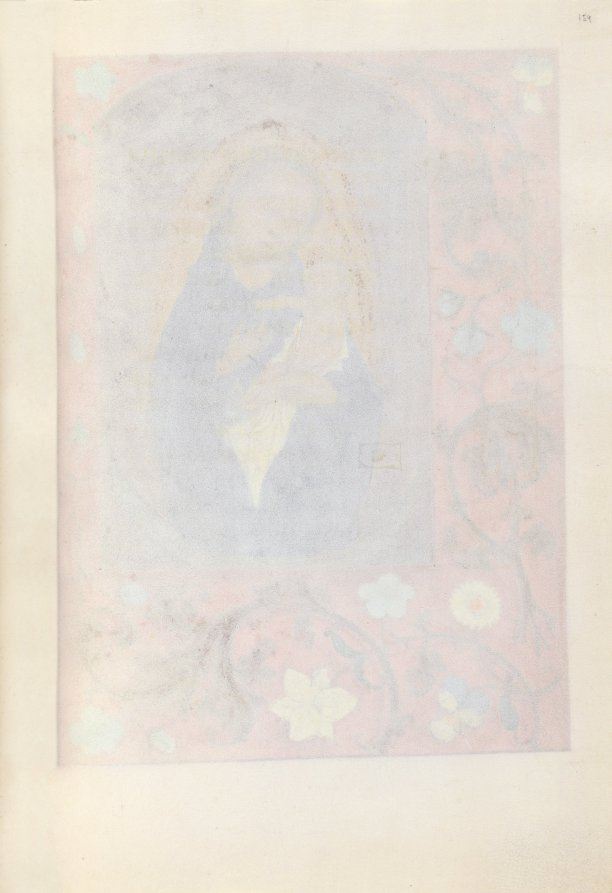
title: Hours of Queen Isabella the Catholic, Queen of Spain: Fol. 159r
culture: Flanders, Ghent and Bruges, late 15th century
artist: Master of the First Prayerbook of Maximillian (Flemish, c. 1444–1519)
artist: and Associates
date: c. 1500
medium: ink, tempera, and gold on vellum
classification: Bound Volume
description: This manuscript was illuminated by a circle of at least five highly organized manuscript painters active in the Flemish cities of Ghent and Bruges. The principal illuminator was Alexander Bening, who painted the majority of the book's miniatures. Manuscripts produced by this circle of artists are renowned for the decoration of their borders, which typically feature a rich variety of realistically-painted flowers, birds, and butterflies. This prayer book, called a book of hours, was intended not for a cleric, but for the private devotions of a lay person-in this case, Isabella the Catholic, Queen of Spain (1451-1504). Isabella's coat of arms embellishes the book's frontispiece. It is unlikely that the book was commissioned by the Queen herself; rather, she probably received it as a diplomatic gift from someone courting her patronage, perhaps Cardinal Francisco Jimenez de Cisneros. A Franciscan friar, Jimenez was dependent upon Isabella for his advancement, first to the post of Queen's confessor in 1492, and then to Archbishop of Toledo in 1495.